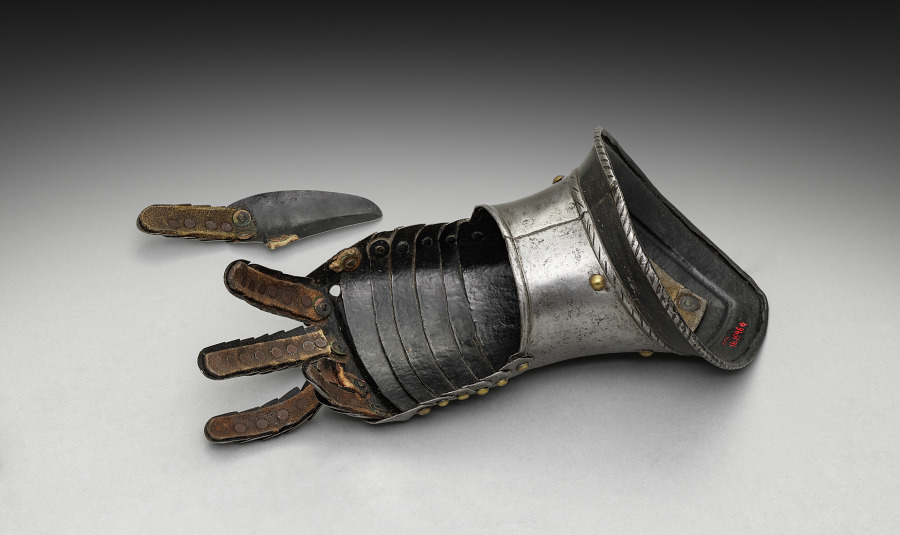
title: Right Gauntlet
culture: Germany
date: c.1550–1570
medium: iron, steel, leather and brass rivets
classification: Arms and Armor